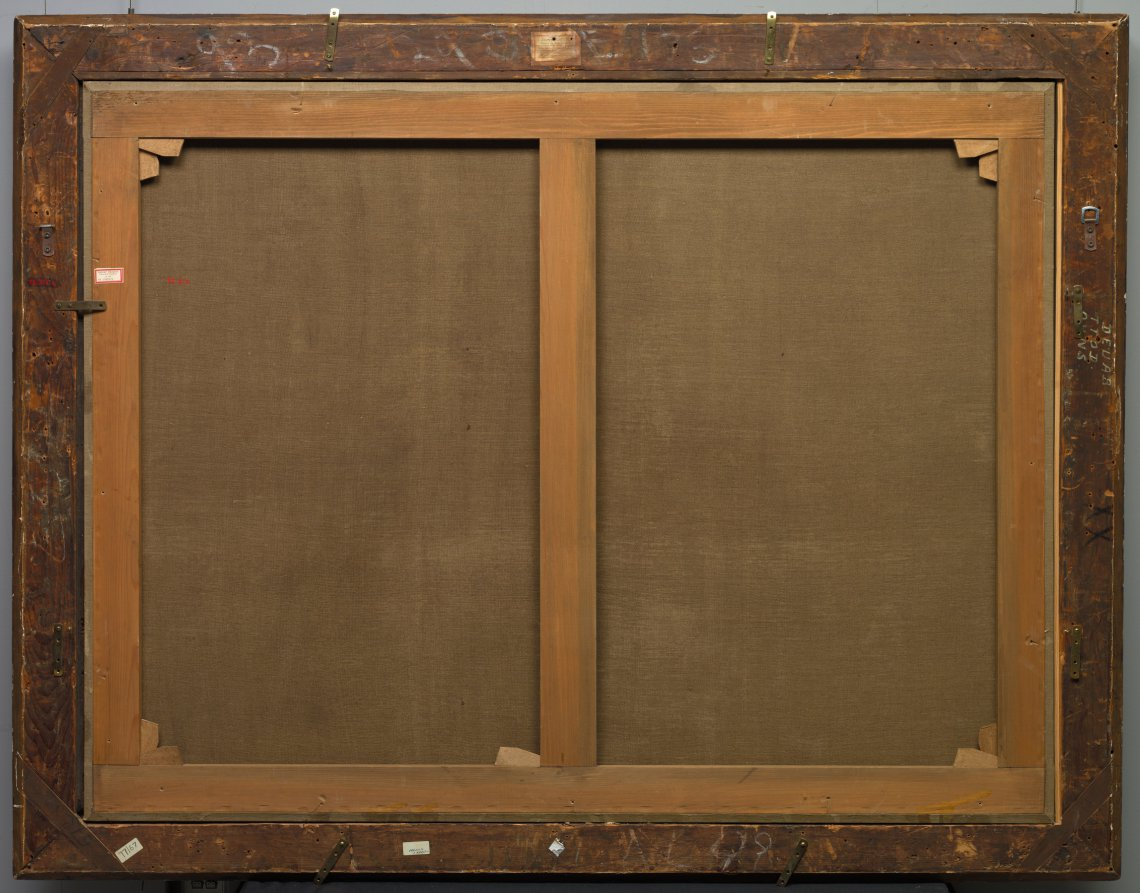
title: Pan and Syrinx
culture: France, 18th century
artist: Jean François de Troy (French, 1679–1752)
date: 1720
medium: oil on canvas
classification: Painting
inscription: Signed lower center: "De Troy 1720"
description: Subjects drawn from classical mythology posed a challenge for painters: they demanded skill in depicting the human body in complex poses, as well as knowledge of ancient texts and an ability to interpret them imaginatively. Jean François de Troy’s rich colors and voluptuous figure types were ideal for depicting the sorts of mythological subjects favored by his elite patrons, which generally focused on themes of love. In a myth recounted in the Roman poet Ovid’s Metamorphoses, the nymph Syrinx fled from the lecherous advances of the god Pan. Trapped at the edge of a river, she begged for a way to escape, and the gods transformed her into reeds. Pan later gathered these reeds to form the pan pipes, the musical instrument forever associated with him.